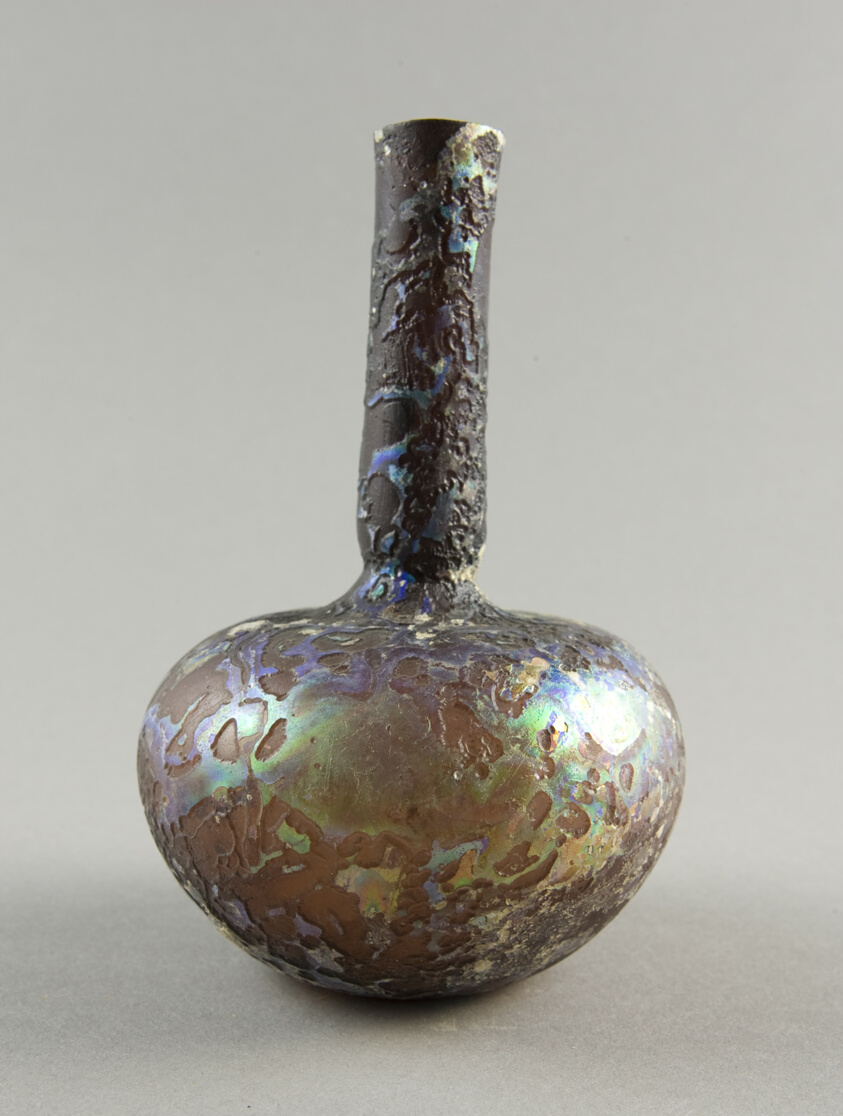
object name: Vessel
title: Bottle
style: syrian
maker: Islamic ?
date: 8th-10th century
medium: Glass, blown technique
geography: Syria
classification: bottle; glass; vessel; ancient art